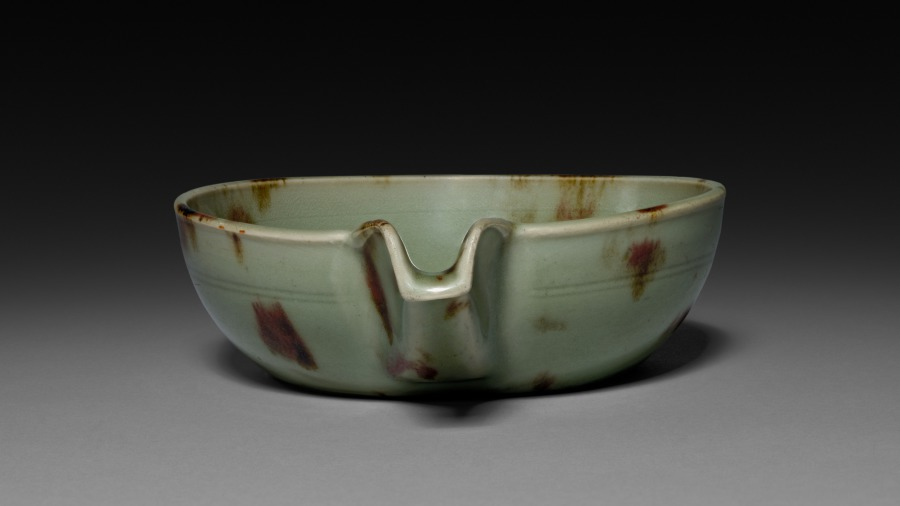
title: Spouted Bowl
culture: China, Zhejiang province, Longquan region, Yuan dynasty (1271-1368)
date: 1300s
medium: Celadon-glazed stoneware spotted with copper red, Longquan ware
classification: Ceramic